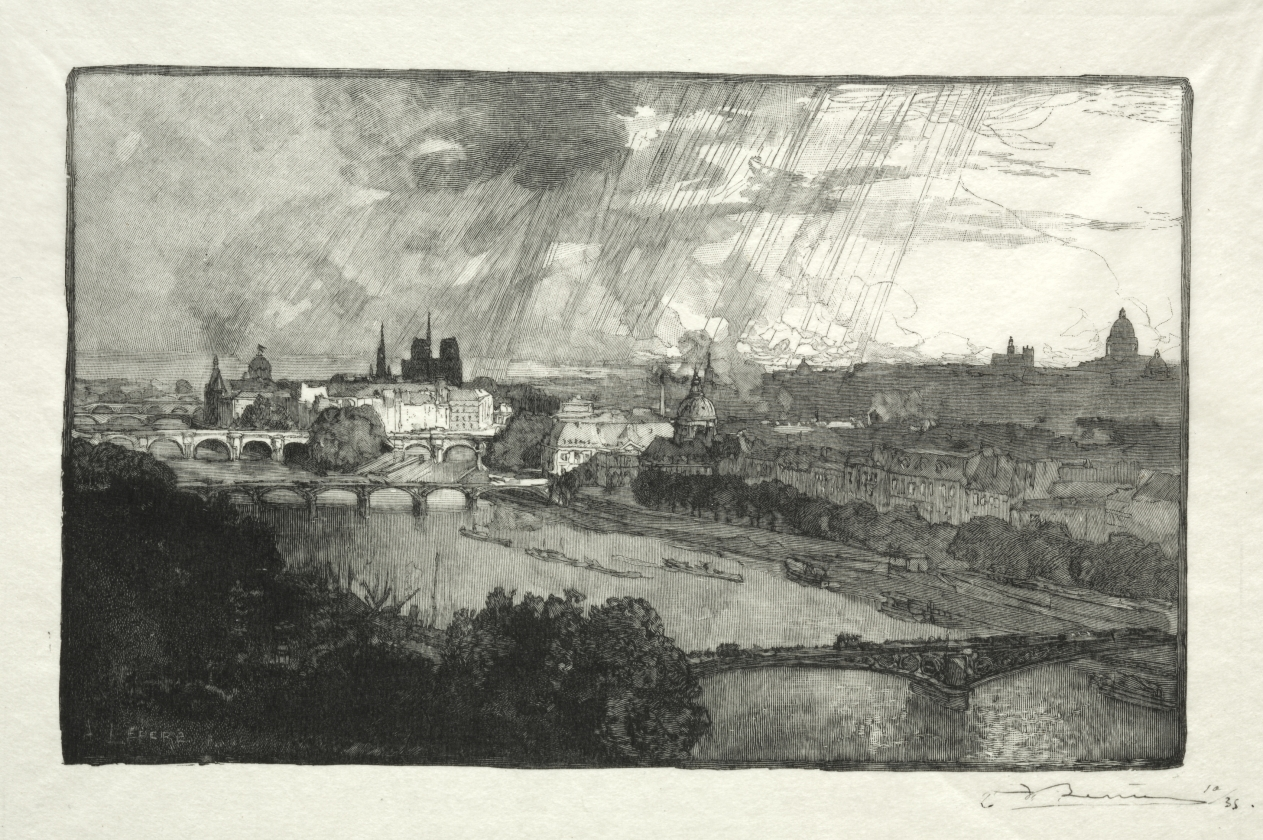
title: Paris, vu du Pavillon de Flore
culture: France, 19th century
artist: Auguste Louis Lepère (French, 1849–1918)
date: 1890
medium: wood engraving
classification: Print